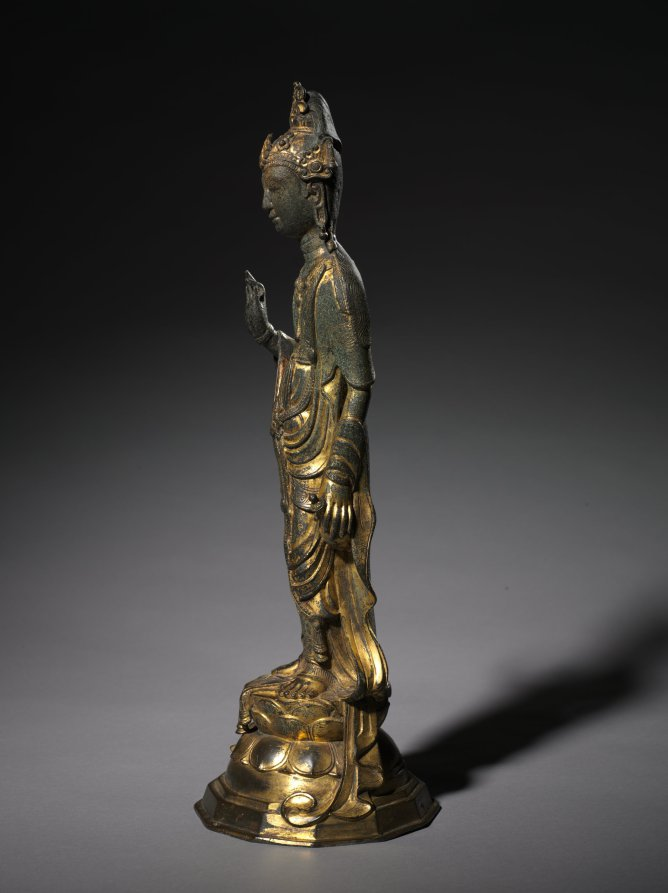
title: Bodhisattva Guanyin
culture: China, Liao dynasty (916-1125)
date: 900s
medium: gilt bronze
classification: Sculpture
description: In Buddhism, a bodhisattva is a being who, just before reaching enlightenment, turns back to assist others to reach enlightenment first. This bodhisattva holds his hand palm forward, in a gesture that tells followers not to fear. In his other hand he carries a bottle that holds the elixir of immortality.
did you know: The Liao rulers were devout Buddhists who commissioned substantial religious projects.